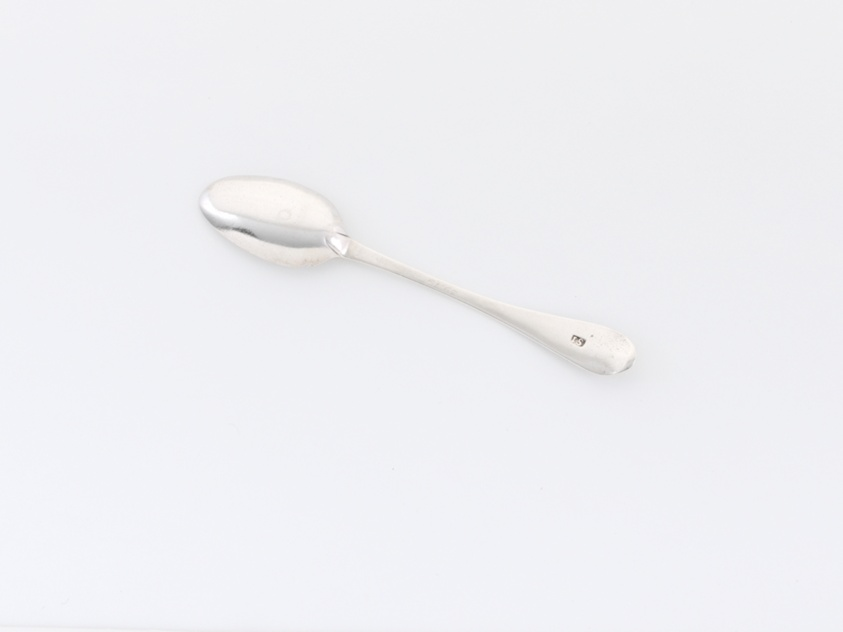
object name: Metalwork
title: Pair of Coffee Spoons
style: 18th Century, 19th century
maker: Artist unknown (American, 18th–19th century)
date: 1790–1812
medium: Silver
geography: United States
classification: spoon; silver; utensil; american decorative arts; american arts; decorative arts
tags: spoon, eating, dining